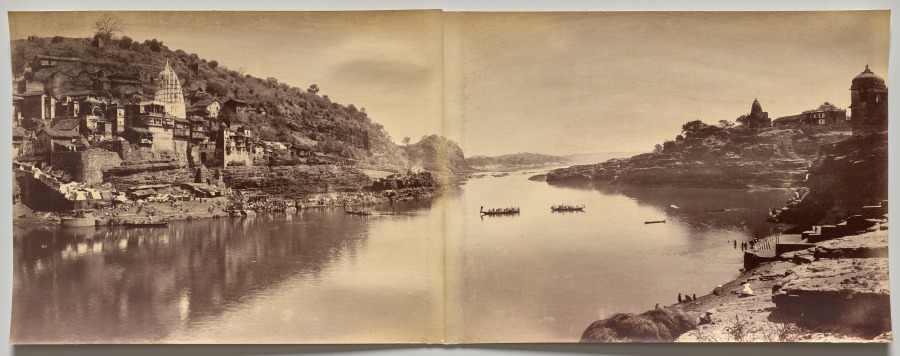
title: Two-Part Panorama with View of the Narmada River at Omkareshwar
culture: India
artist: Raja Deen Dayal (Indian, 1844–1905)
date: 1882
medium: albumen print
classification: Photograph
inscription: Inscription at center left edge of left-side print: "1615"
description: This stunning panorama boldly places the sacred Narmada River in the middle and foreground. Raja Deen Dayal forces the viewer’s eye to journey between the left-hand island with Omkareshwar Temple, an important pilgrimage site that is one of 12 revered Jyotirlinga shrines of Shiva, and Mamleshwar, a shrine to Shiva on the river’s south bank, which is on the mainland.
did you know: The temple on the left is believed to one of 12 places—Jyotirlinga shrines—where the Hindu god Shiva appeared as a bright column of light.